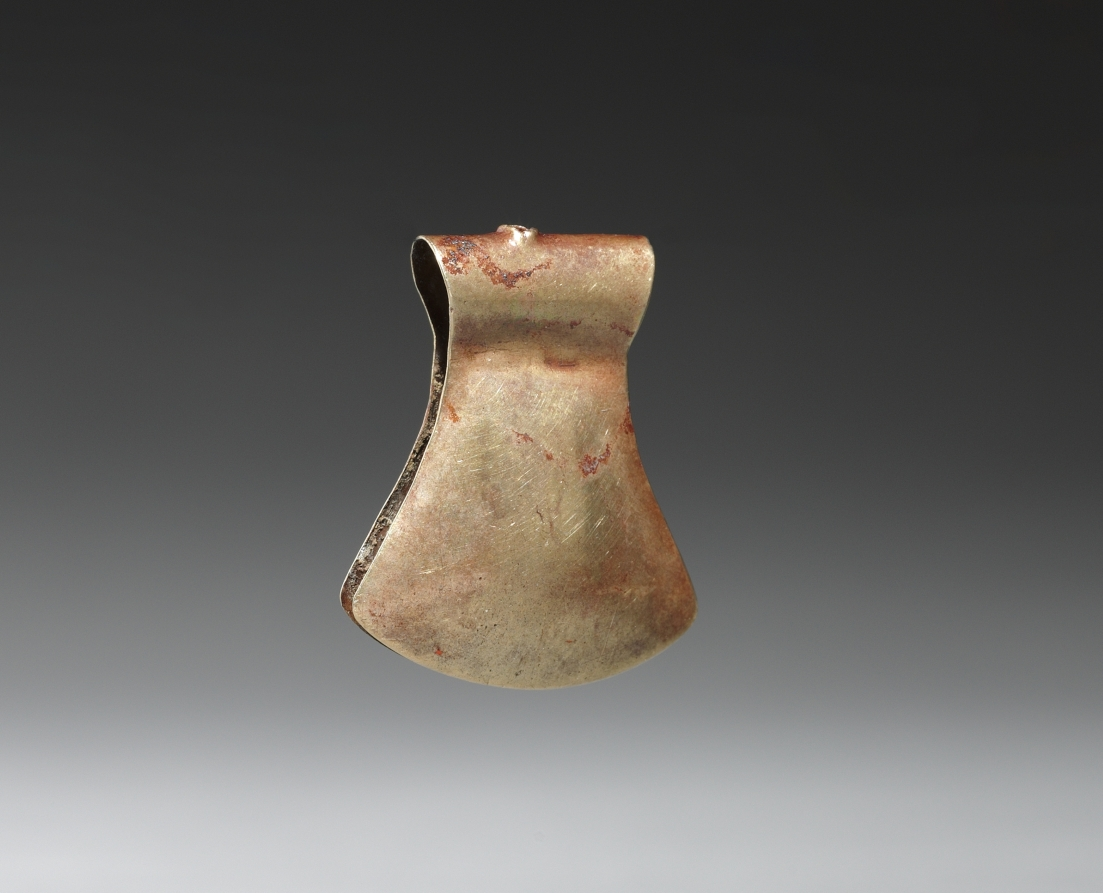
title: Tweezer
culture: Peru, North Highlands, Chavín de Huantar(?), Chavín style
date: c. 500–200 BCE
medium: hammered and cut gold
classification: Metalwork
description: There seems to be a link between Chavín religion and appearance of the Andes’ first large precious-metal objects, made using revolutionary new metallurgical processes. Chavín may have developed these technical innovations to express the inexpressible, the "wholly other" nature of its religion. In many areas, elite men and women wore the ornaments as emblems of their ties to this religion, and eventually were buried with them. These 16 objects, along with three others not in the museum’s collection, are said to have come as a group from Chavín itself.